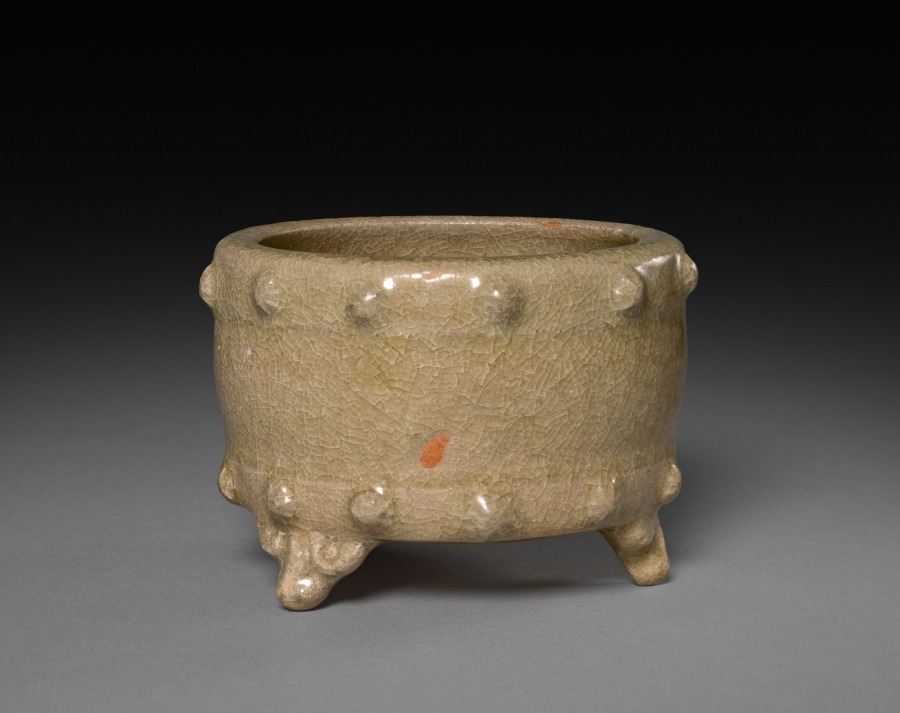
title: Incense Burner: Southern Celadon Ware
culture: China, Yuan dynasty (1271-1368)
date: 1271–1368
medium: glazed buff stoneware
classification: Ceramic